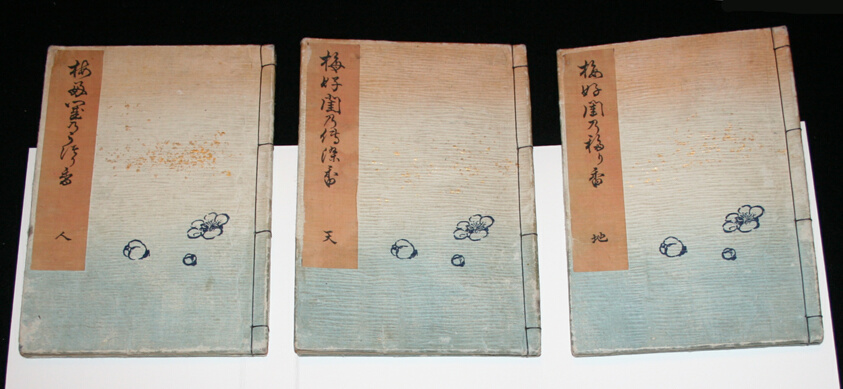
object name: Book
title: Umegonomi neya no utsuriga (Lingering plum scent in the sleeping chamber)(0017-0019)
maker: Utagawa Kunisada I (Japanese, 1786-1864)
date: c.1841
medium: Three color woodblock printed volumes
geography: Japan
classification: book